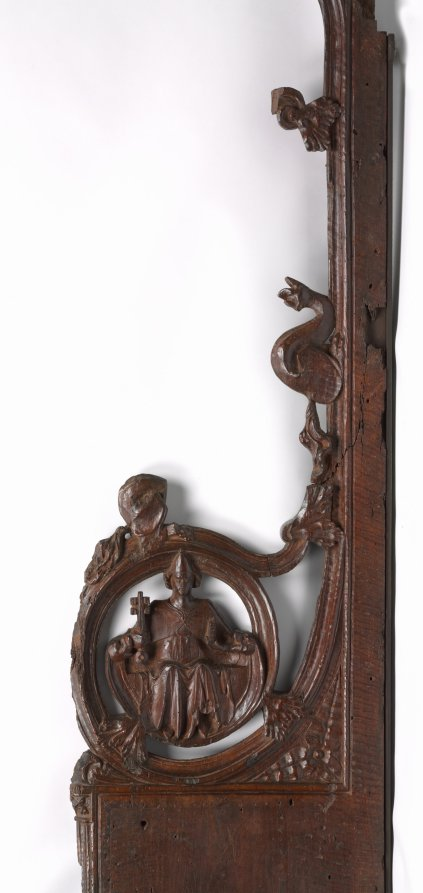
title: Panel from a Choir Stall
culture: Spain, Catalonia, Monastery of Pedralbes, 14th century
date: c. 1330–1340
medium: walnut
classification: Furniture and woodwork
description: The large panel shown here was probably the end panel of a stall that faced another across the choir of a Gothic church. The panel depicts a seated pope, possibly Urban IV, who holds the keys of St. Peter and a book.